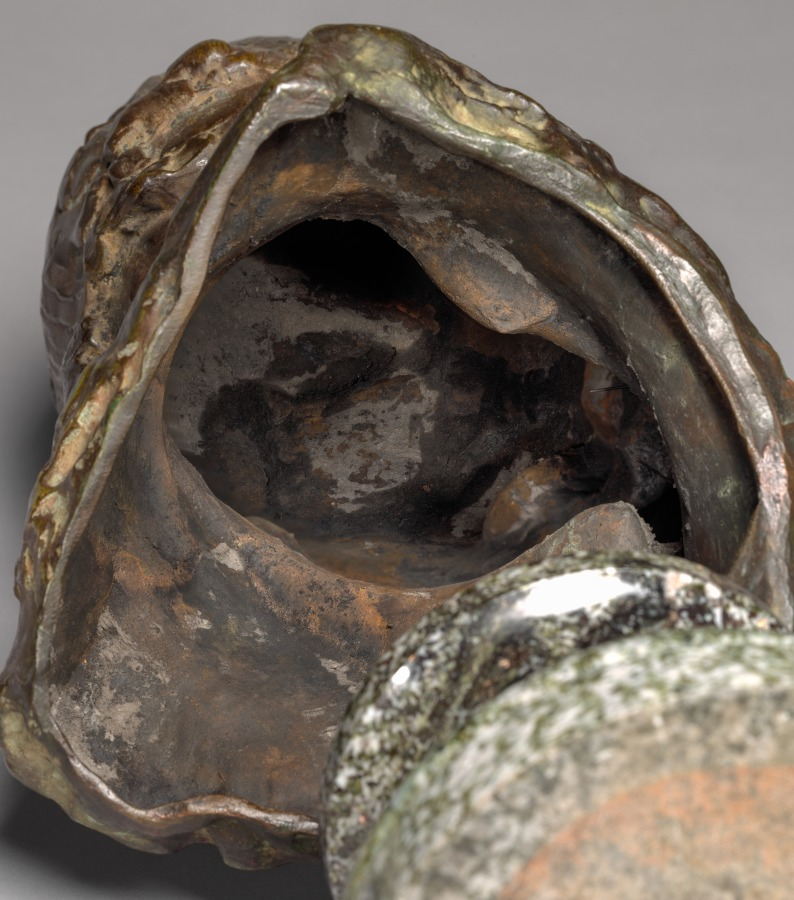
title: Bust of Victor Hugo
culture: France, 19th century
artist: Auguste Rodin (French, 1840–1917)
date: 1883 modeled; cast by 1917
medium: bronze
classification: Sculpture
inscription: inscribed on back: "A. Rodin" signed "Rodin" (back, lower left)